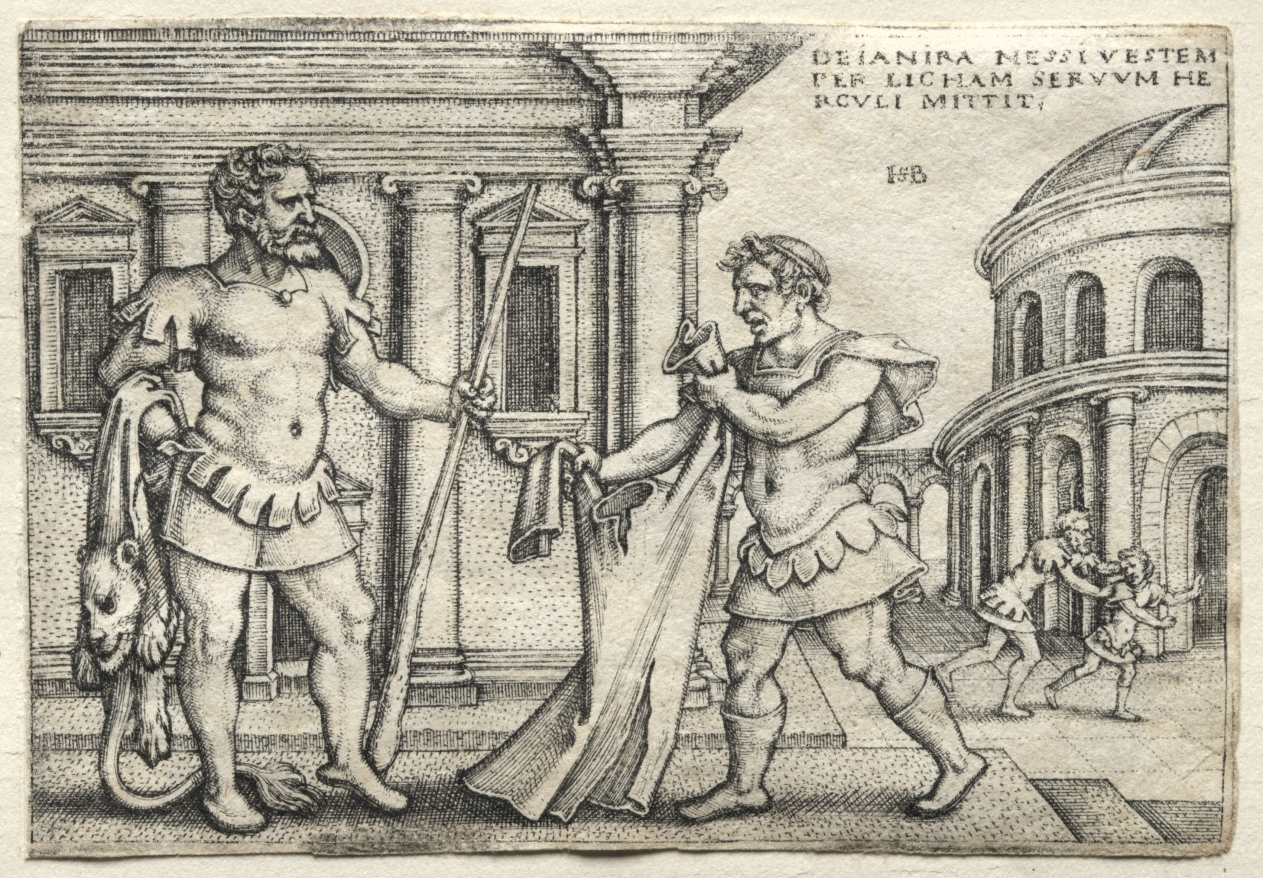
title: The Labors of Hercules: Hercules Receiving the Garment Steeped in Nessus' Blood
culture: Germany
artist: Hans Sebald Beham (German, 1500–1550)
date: 1542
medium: engraving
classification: Print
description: Perceiving the princess Iole as a rival, Hercules’s wife Deianeira soaks a shirt in the blood of the centaur Nessus and sends it to her husband. Deianeira believes the blood is a love potion that will secure Hercules’s undying affection, but it is actually poisonous. Here, a servant named Lichas delivers the toxic shirt. Beham was one of several German printmakers referred to today as the “Little Masters.” They established their artistic prowess by engraving remarkably small prints, appealing to collectors fascinated with miniature objects and curiosities.